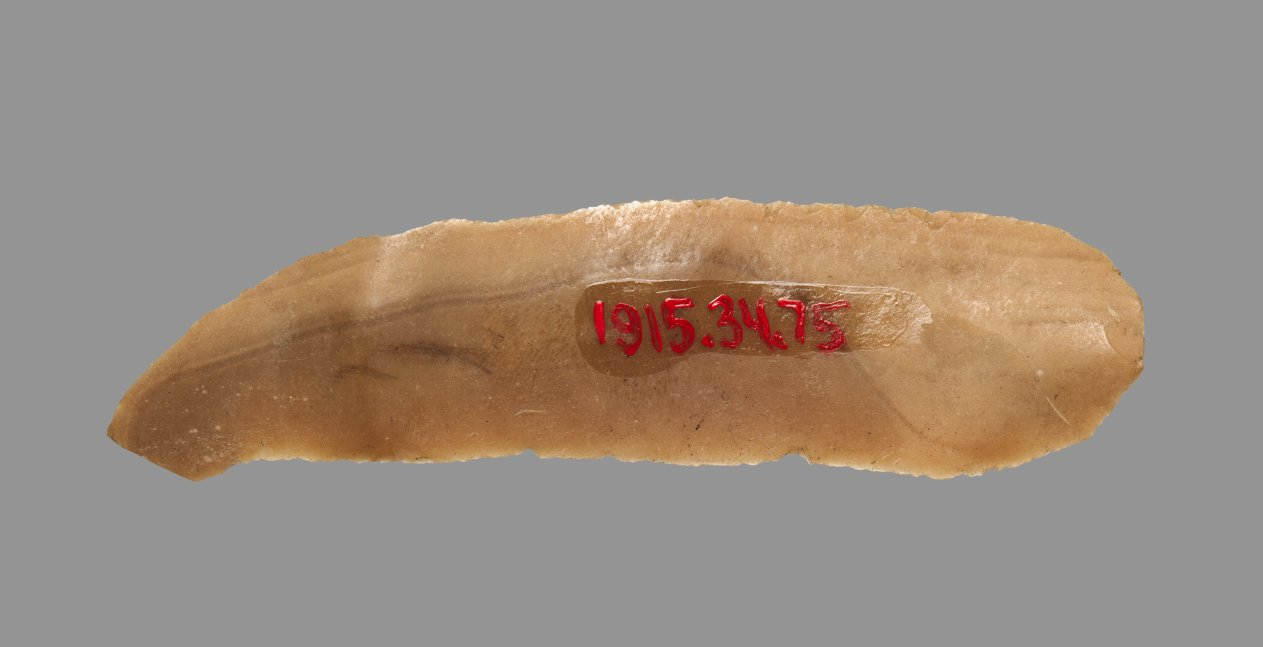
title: Sickle Blade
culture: Egypt, Middle Kingdom (2040–1648 BCE), Dynasty 12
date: 1980–1801 BCE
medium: flint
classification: Implements